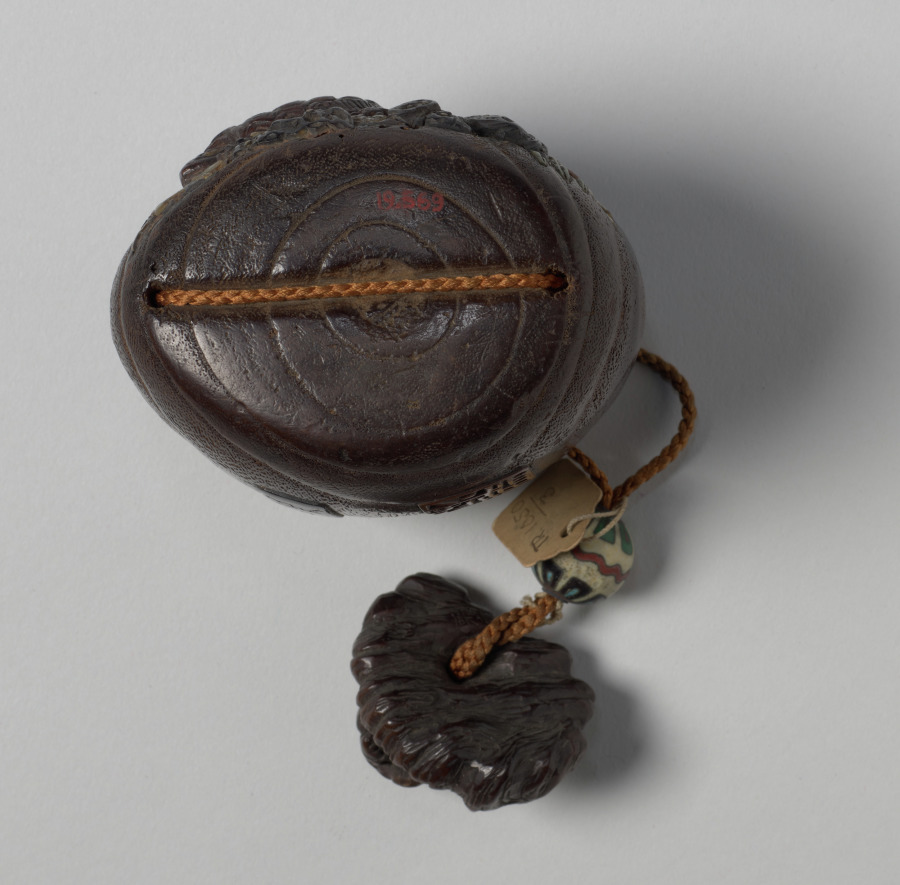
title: Tobacco Box with Turtles in Lotus and Grasses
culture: Japan, Edo period (1615–1868)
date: c. 1760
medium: Box: wood with color and metal, shell, and stone inlay; toggle (ojime): ceramic; netsuke: wood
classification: Miscellaneous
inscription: Box signed: 岷江 花押; sealed: 岷江; netsuke signed: 栗斎